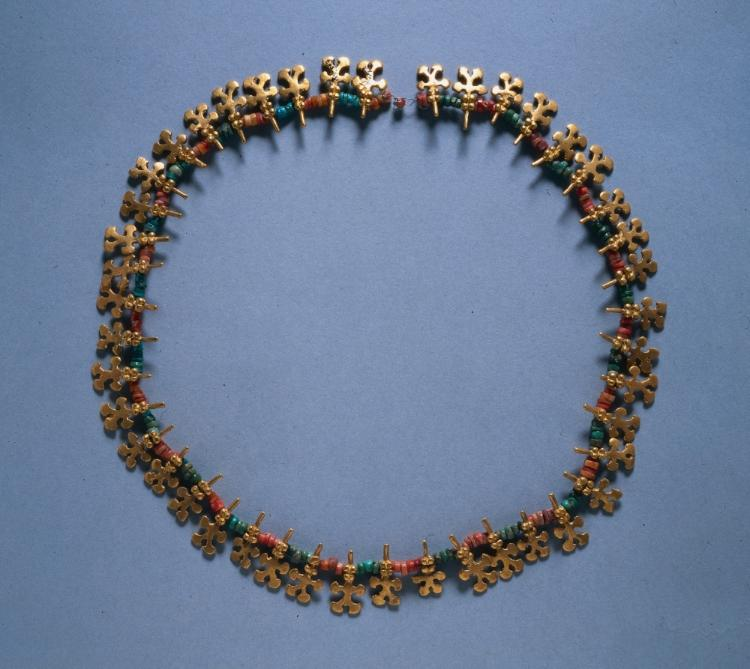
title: Necklace of Insect(?) Beads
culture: Colombia, Malagana region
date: 300 BCE–300 CE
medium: cast gold, turquoise, shell (modern stringing)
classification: Jewelry